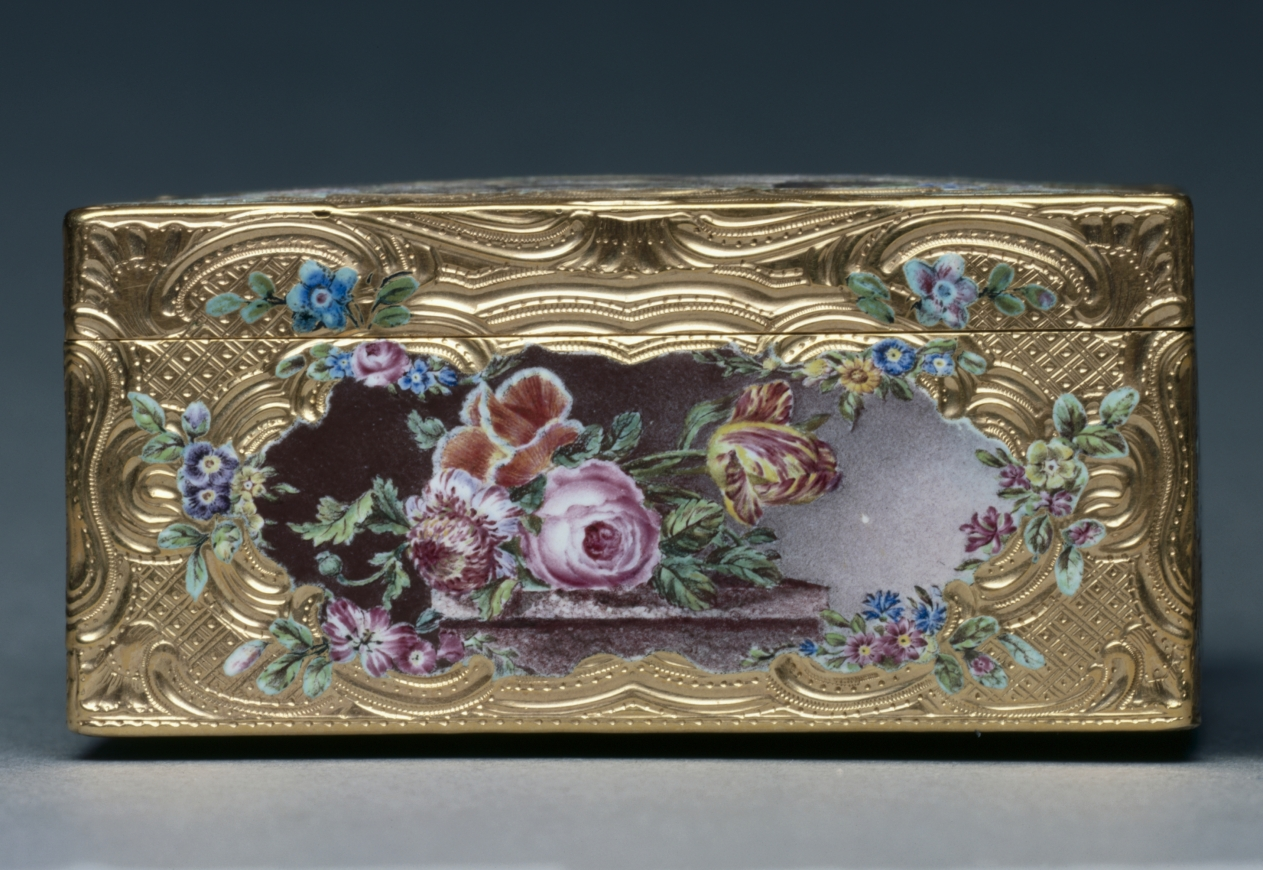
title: Snuff Box (Tabatière)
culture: France, 18th century (style of Louis XV)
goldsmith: Francois Guillaume Tiron (French)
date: 1756–57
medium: gold and enamel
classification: Miscellaneous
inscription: [Maker's mark of Francois-Guillaume Tiron, master goldsmith in 1747, inside cover; left wall]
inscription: [Warden's mark for Paris, 1756-1757, inside cover]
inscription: [Charge mark of Julien Berthe, Paris, 1750-1756, inside cover; left wall]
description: The miniature paintings that decorated snuff boxes were depicted in intricate detail requiring complex technical skill. This box’s miniatures are painted with enamel en plein, meaning the enamel has been applied directly to the metal of the box. A different enameling technique, basse-taille, is used to depict the doves and floral borders. Here, the gold has been chiseled away and filled with translucent enamel in order to produce a three-dimensional effect.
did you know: In the mid-1700s François-Guillaume Tiron worked alongside his brother, Jean-Marie Tiron, one of the most celebrated makers of gold boxes of the 18th century.